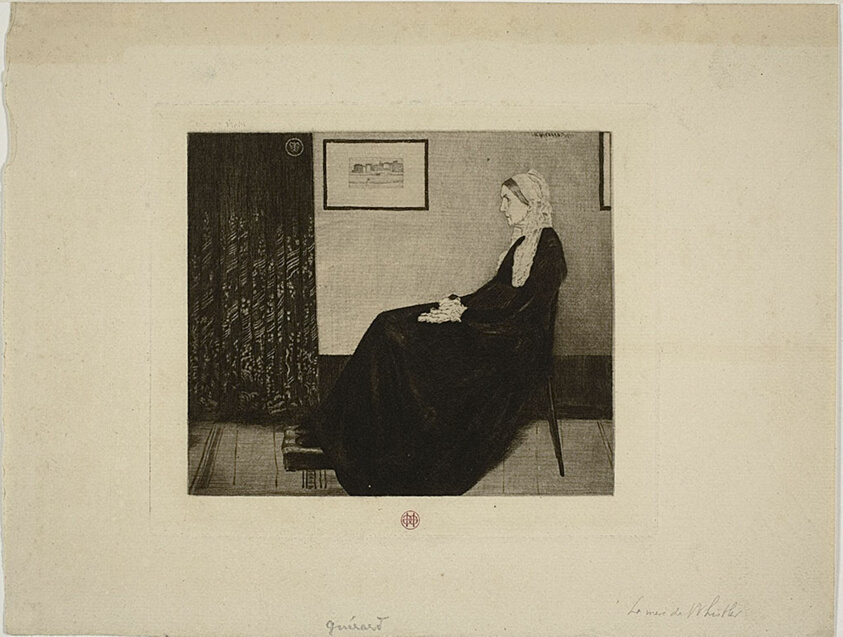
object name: Print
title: Whistler's Mother, after Whistler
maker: Henri Charles Guérard (French, 1846-1897); after James McNeill Whistler (American, 1834-1903)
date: c. 1883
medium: Etching in brown on cream laid paper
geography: France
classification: etching; print; prints and drawing